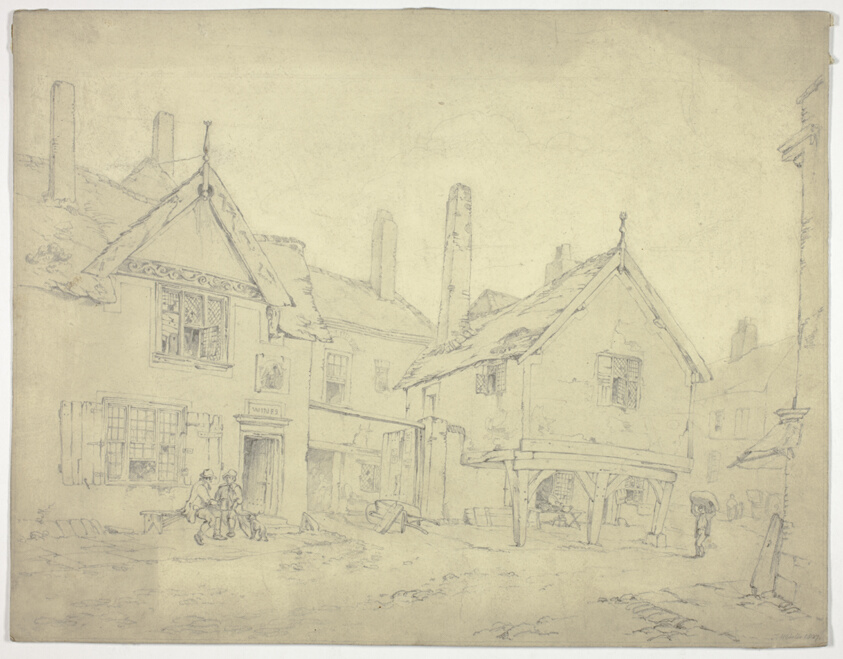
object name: Drawing and Watercolor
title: Foregate Street, Chester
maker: Thomas Webster (English, 1800-1886)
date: 1827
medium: Graphite on ivory wove paper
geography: England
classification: graphite; drawings (visual works); prints and drawing